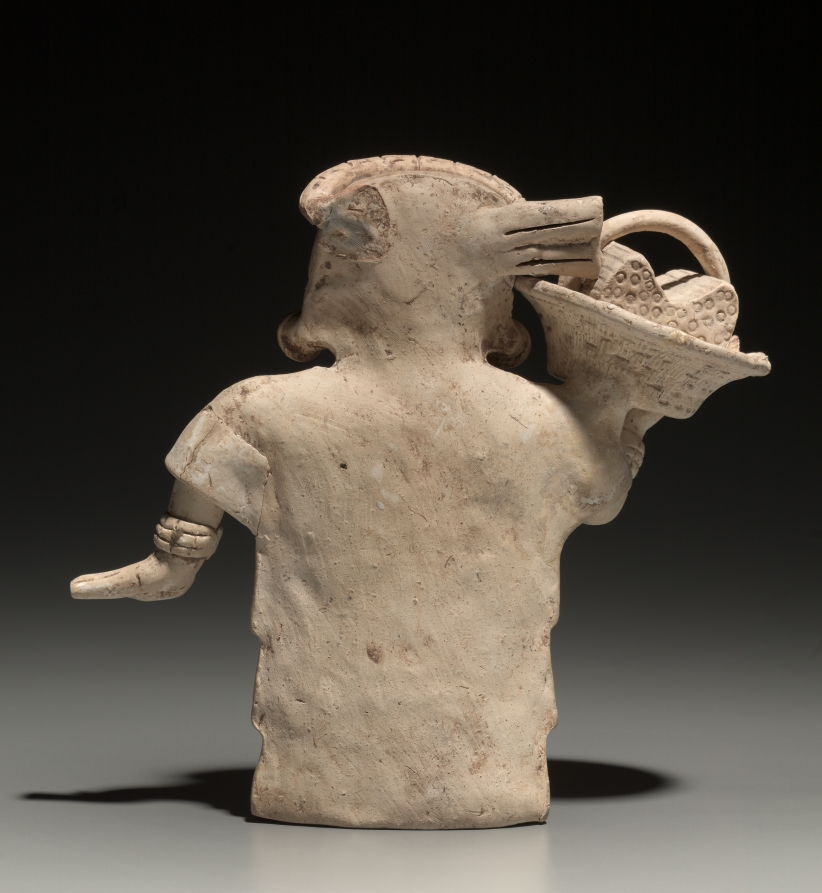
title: Standing Female with Basket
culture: Mesoamerica, Veracruz, Nopiloa style, 7th-10th century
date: 600–1000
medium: ceramic, slip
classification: Ceramic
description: This figure's delicate face features rows of raised dots on the cheeks and the edges of the ears, perhaps representing ornamental scarification; the teeth are decoratively filed into a T or tau shape that may have had symbolic import. On her shoulder she carries a basket or bowl filled with a yet-to-be-identified bundle, perhaps marshy bulrushes. The headdress ties have been lost from one side of the head.